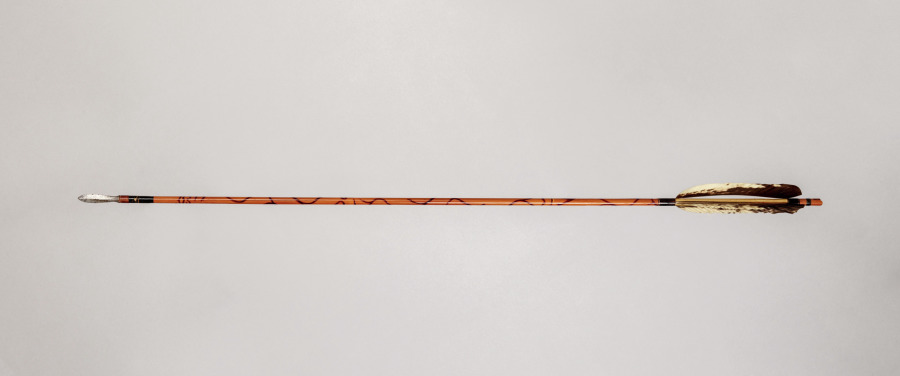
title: Arrow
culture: Japan, Edo period (1615–1868) to Meiji period (1868–1912)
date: 1800s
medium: bamboo shaft tipped with metal point and heeled with feathers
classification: Arms and Armor